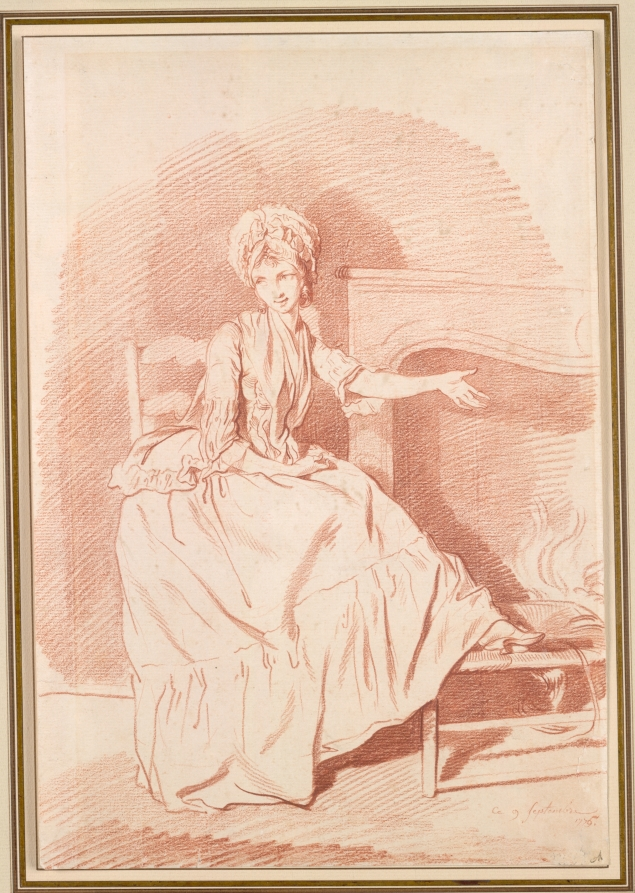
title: L'Invite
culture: France, 18th century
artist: Louis Rolland Trinquesse (French, c. 1746–c. 1800)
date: 1775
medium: Sanguine on white woven paper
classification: Drawing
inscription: by artist, lower right, in red chalk: le 9 Septembre / 1775.; verso of secondary support, lower center, in graphite: 243 x 358 [superscript "3" and "8" underlined]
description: Although Trinquesse painted in oil, he is best known today for the series of red chalk drawings of full-length female figures in domestic settings to which this sheet belongs. These works fall somewhere between portraiture and genre scenes (scenes of everyday life) and focus on nuances of pose, gesture, and expression. The traditional title of this work suggests the woman is making a flirtatious overture to an unseen male companion.